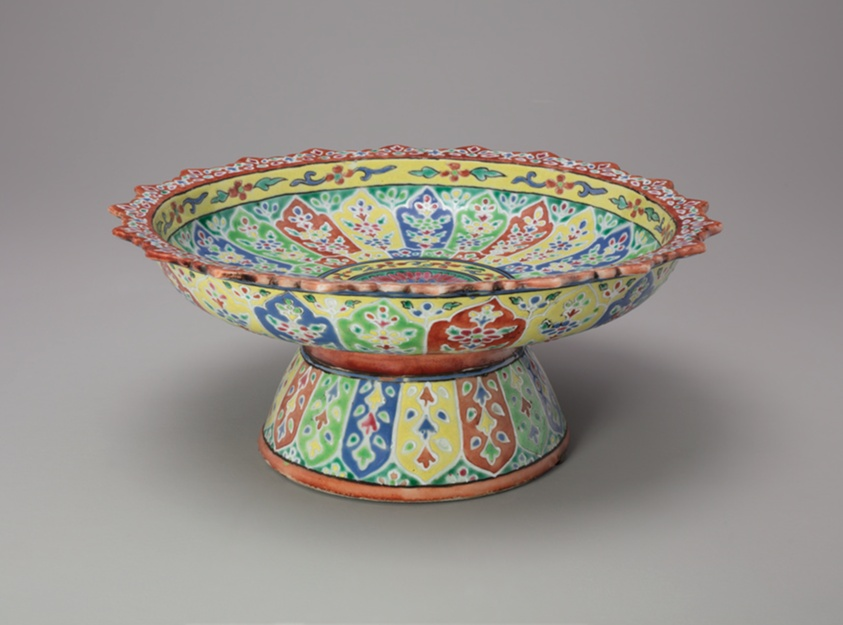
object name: Decorative Arts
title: Bencharong (Five-Colored) Ware, Footed Stem Plate with Foliate Rim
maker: China, for the Thai Market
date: 19th century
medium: Porcelain painted in overglaze polychrome enamels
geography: China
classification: porcelain; asian art; ceramics; decorative arts